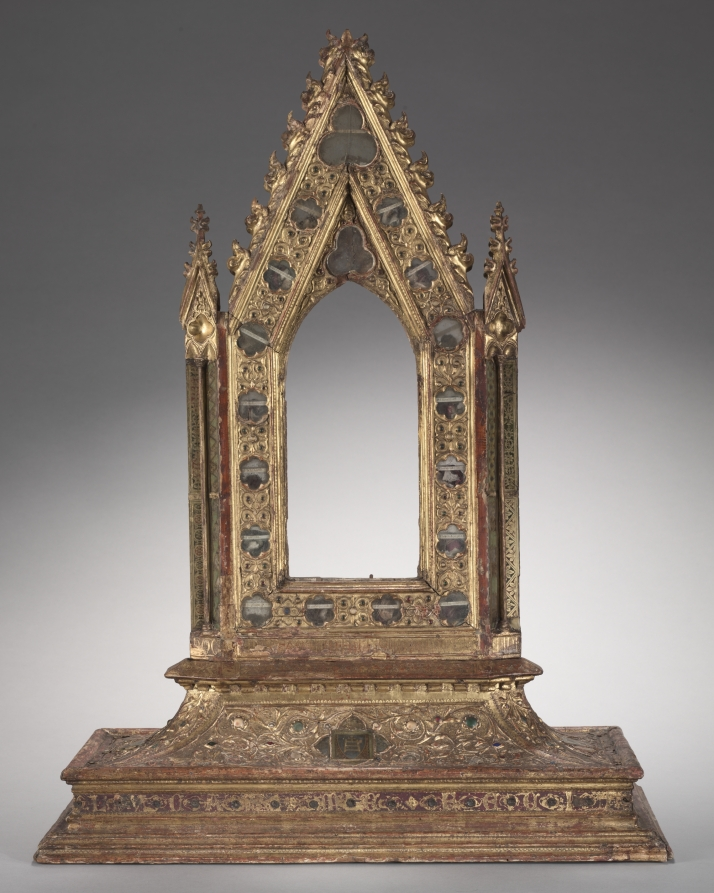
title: Frame for a Portable Reliquary Icon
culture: Italy, Siena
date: 1347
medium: gilded wood, modeled gesso, verre églomisé, glass cabochons, and relics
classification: Glass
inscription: an inscription with a stipled background runs around the lowest edge of the upright part of the frame: obverse: HOC/OPUS : FACTUM . FUIT . SUB . ANNO . DO/MINI; reverse: [small loss] /CCC . XLVII . TEMPORE . DOMINI . MINI/CINI. [This/work : has . been . made . under . year . of . the . Lord [small loss] /300 47 . in . the . time . of the Lord . Mini/Cini.] Another inscription appears on the obverse and reverse of the base: LUCAS ME FECIT. [Luke has made me.]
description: In the Middle Ages relics were thought to possess extraordinary power and were enshrined in lavish vessels called reliquaries. This complex frame once contained a painted image on each side, believed to be the Madonna and the Crucifixion, both long since lost. These images were surrounded by 17 carefully labeled relics, still visible. Intentionally portable, such votive objects could be easily carried from room to room or building to building as needed. A Latin inscription around the base reads: This work has been made under the year of the Lord CCCXLVII [1347] in the time of the Lord Mini/Cini. The inscription likely refers to Mino Cinughi, rector of the Hospital of Santa Maria della Scala in Siena, 1340-51. The Cinughi coat of arms as well as those of the hospital appear on the base. Another inscription, LUCAS ME FECIT (Luke made me), appears on both sides of the base. While this object probably resided on an altar in the hospital, the fact that it has two sides suggests it was carried aloft in processions.